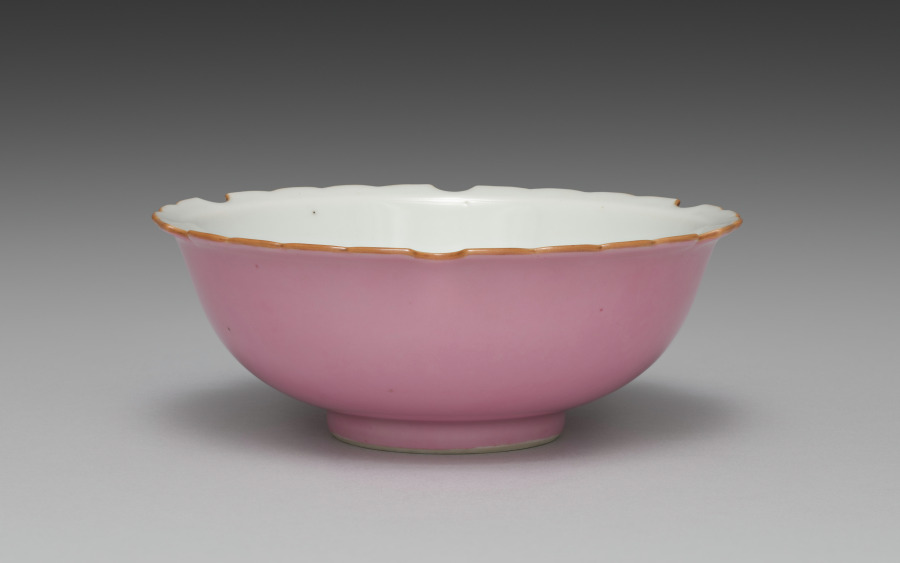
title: Dish from Snow-Flake Side Dishes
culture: Japan, Meiji period (1868–1912)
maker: Seifū Yohei III (Japanese, 1851–1914)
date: 1893–1914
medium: One from a set of six porcelain dishes; porcelain with lobed rims and pink glaze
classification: Ceramic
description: According to the box lid, this set of six side dishes, or mukōzuke, are “snow-flower style” (sekkashiki), having mouths shaped like snowflakes. Their mouths, which have six lobes and scalloped edges, are traced with brown iron oxide at the rim. The outside of each bowl is glazed with a very bright pink over the basin and foot, and the inside is left white. From directly above, one sees a snowflake-like shape, and from the side, they seem to float above a rosy ground.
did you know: The box for this set of dishes has an inscription on the side noting that they were for a person with the family name Nakamoto.